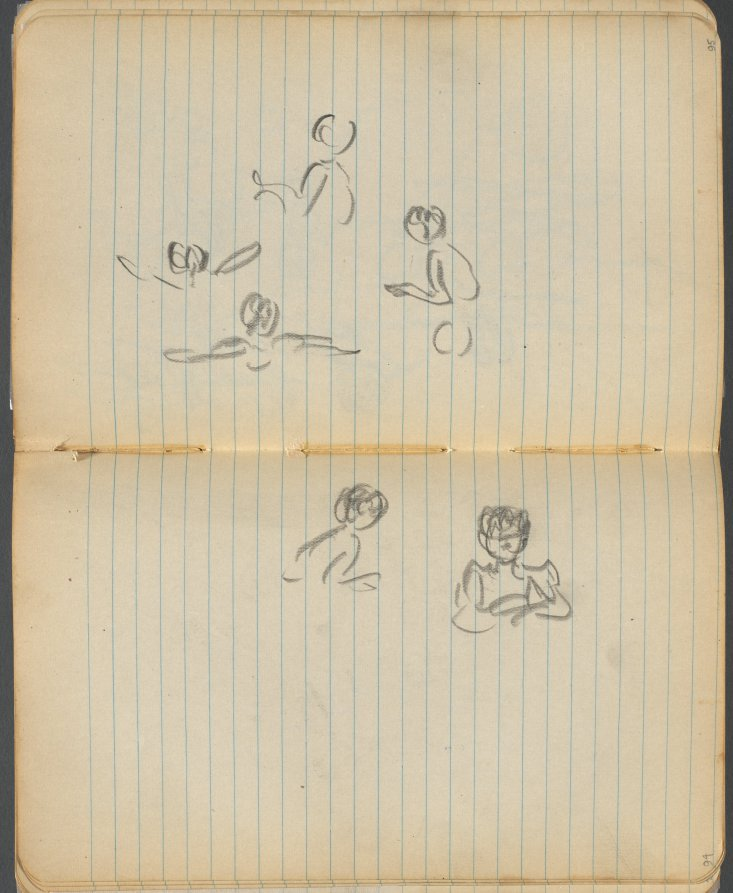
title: Sketchbook, page 094 & 95: Swimming Figures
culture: America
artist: Maurice Prendergast (American, born Newfoundland [now Canada], 1858–1924)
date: 1905–10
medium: graphite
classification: Bound Volume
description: This sketchbook contains 69 pages of drawings, a diary largely devoted to the state of the artist's health, and a three-page discourse on the nature of genius and ideas.